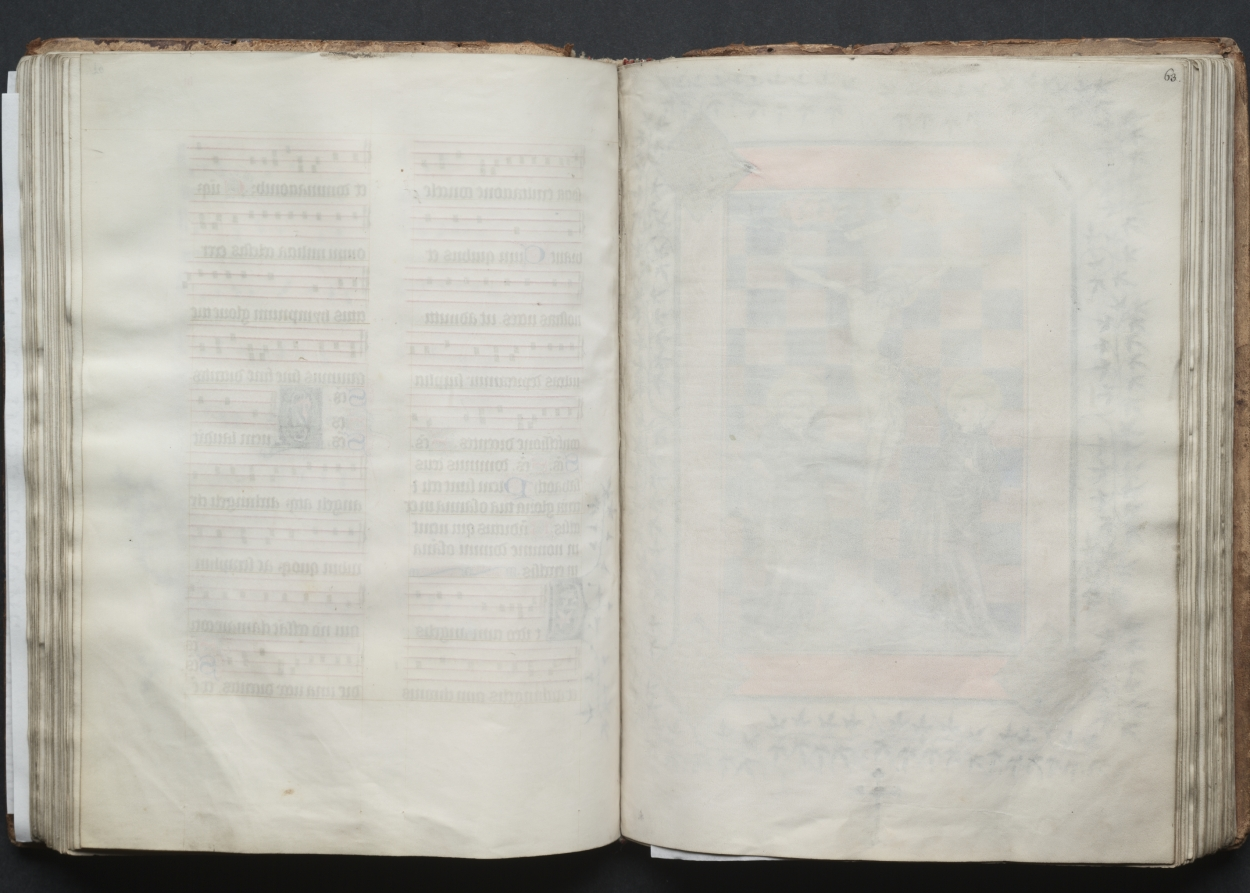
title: The Gotha Missal: Fol. 63r, Text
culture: France, Paris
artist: Master of the Boqueteaux (French)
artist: and Workshop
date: c. 1375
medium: ink, tempera, and gold on vellum; blind-tooled leather binding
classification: Bound Volume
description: The style and quality of this manuscript's decoration is typical of deluxe Parisian books made for aristocratic or royal patrons. Most of the book's decoration appears to be the work of the Master of the Boqueteaux, an artist active at the court of King Charles V (died 1380). His style was apparently shared by a number of book illuminators working in and around Paris. It is very possible that the Gotha Missal belonged to Charles V, but is not provable because the manuscript has no royal portraits and lacks a colophon. Given the book's magnificent decoration, however, it would seem that it was produced for a Valois prince, if not for the king himself. The manuscript receives its name from the German dukes of Gotha, its later owners.